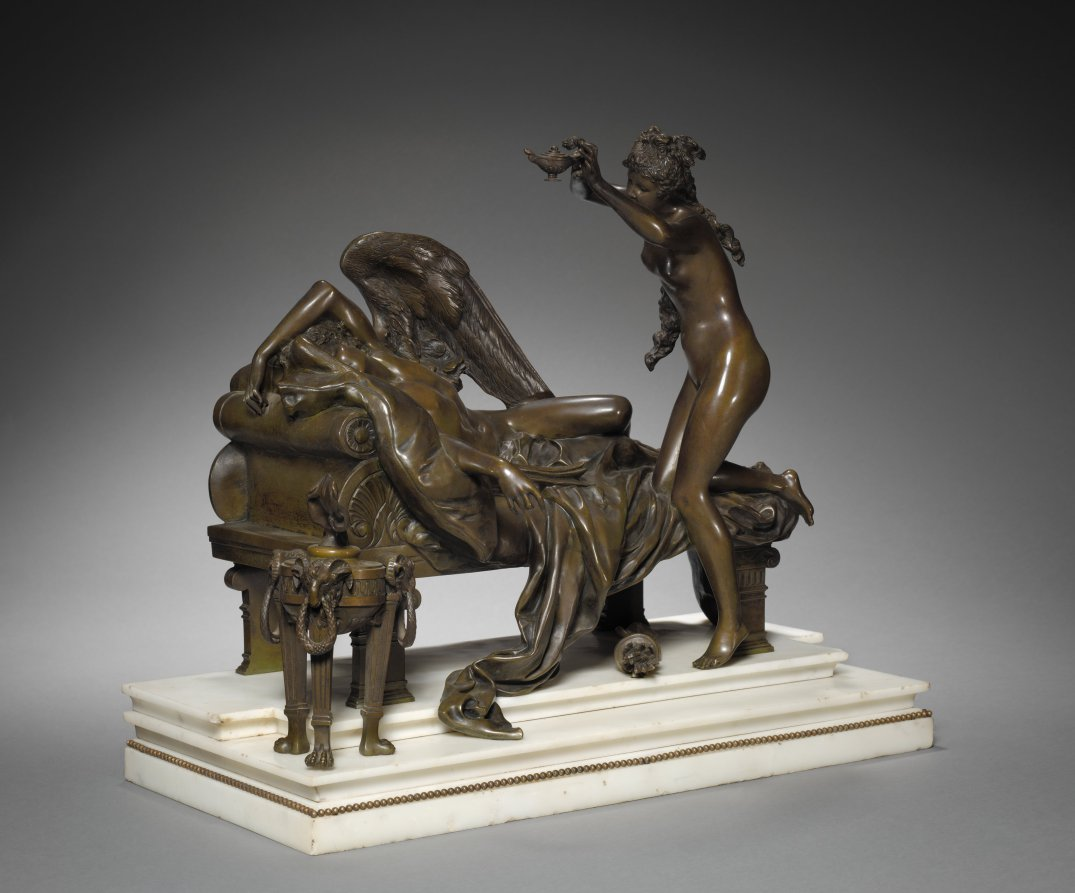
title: Cupid and Psyche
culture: France, 19th century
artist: Albert-Ernest Carrier-Belleuse (French, 1824–1887)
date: c. 1870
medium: bronze with marble base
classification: Sculpture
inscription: signed in ligature on edge of couch at head: "Carrier Belleuse."